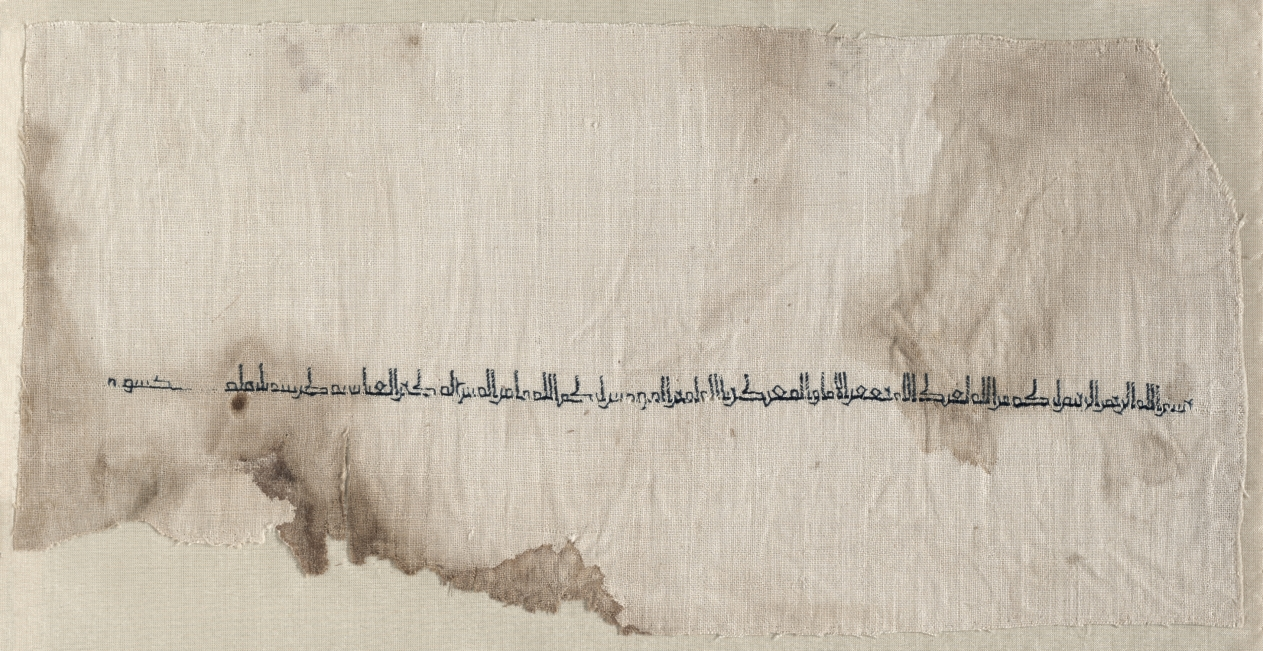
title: Fragment of a Tiraz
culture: Egypt, Misr, Second Abbasid period, Caliphate of al-Muqtadir, AH 306-311 (A.D. 918-923)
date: 918 – 923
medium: silk embroidery on linen tabby ground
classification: Embroidery